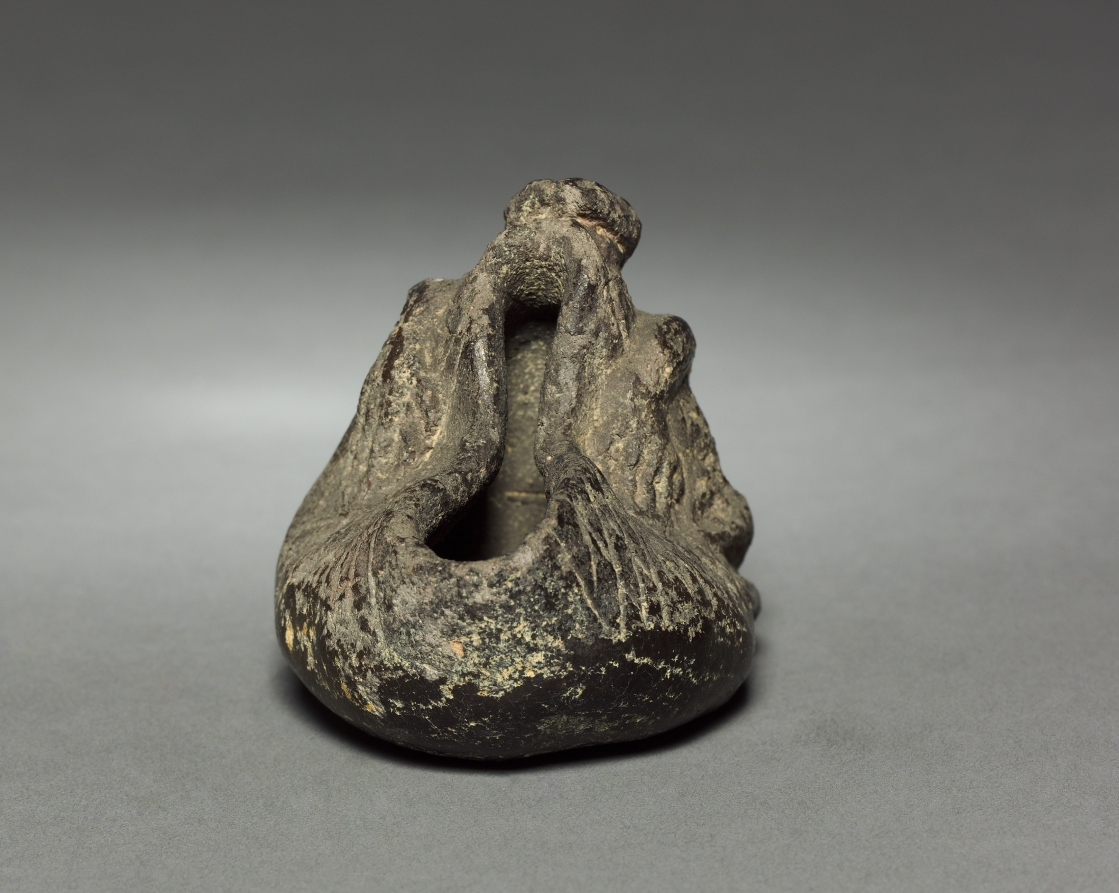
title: Dish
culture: Colombia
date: before 1921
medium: pottery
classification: Ceramic